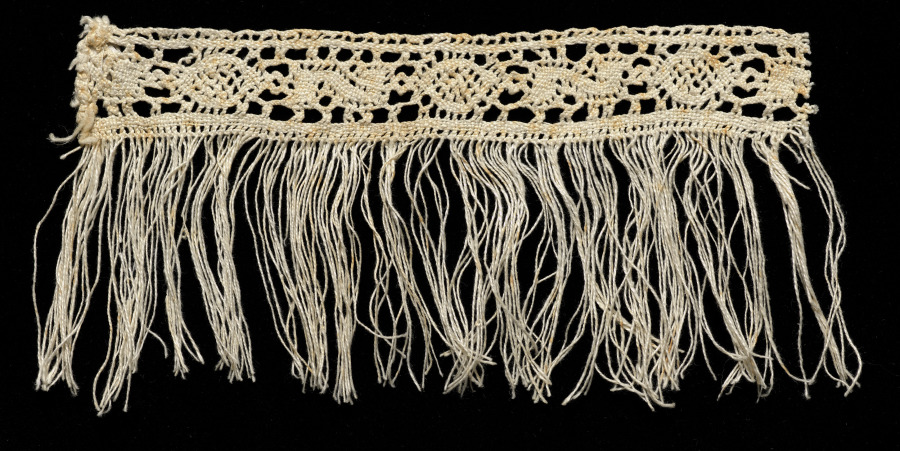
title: Lace Insertion with Fringe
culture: Italy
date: 1600s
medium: linen: bobbin lace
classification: Lace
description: Although this fringed bobbin lace fragment is made of linen, its format is like those for laces made of gold, silver, and colored silk threads.